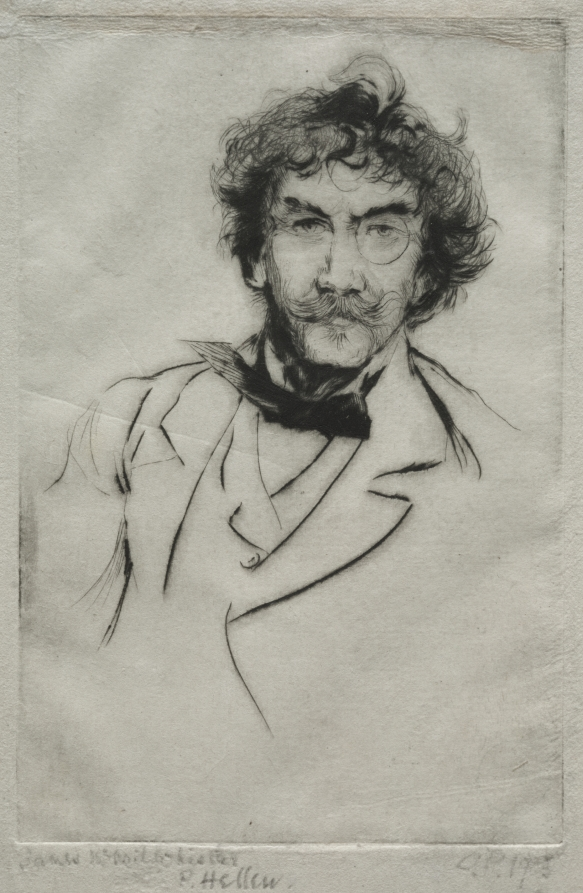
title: James MacNeill Whistler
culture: France, early 20th Century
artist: Paul César Helleu (French, 1859–1927)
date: 1903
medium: drypoint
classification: Print